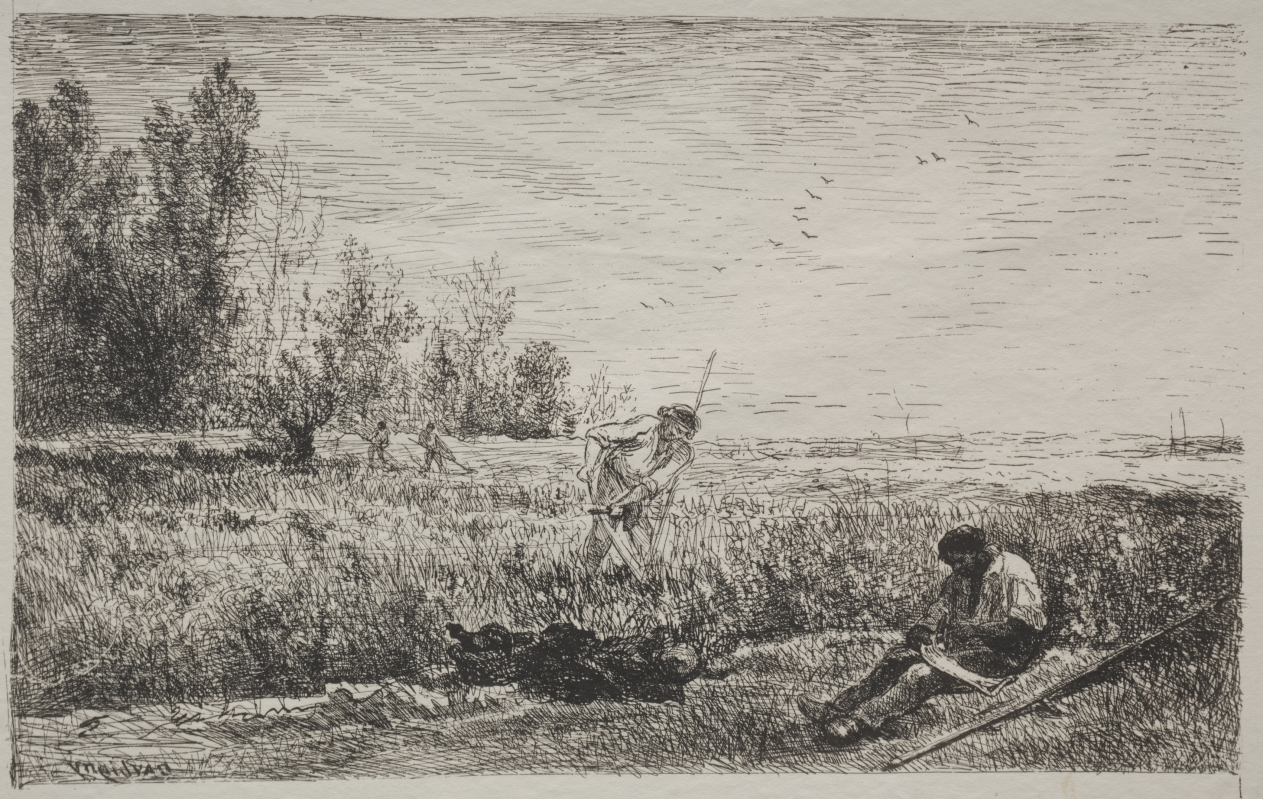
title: Hay-making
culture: France, 19th century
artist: Charles François Daubigny (French, 1817–1878)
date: original impression 1862, printed in 1921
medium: cliché-verre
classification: Print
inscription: signed, lower left, in plate: Daubigny (in reverse)